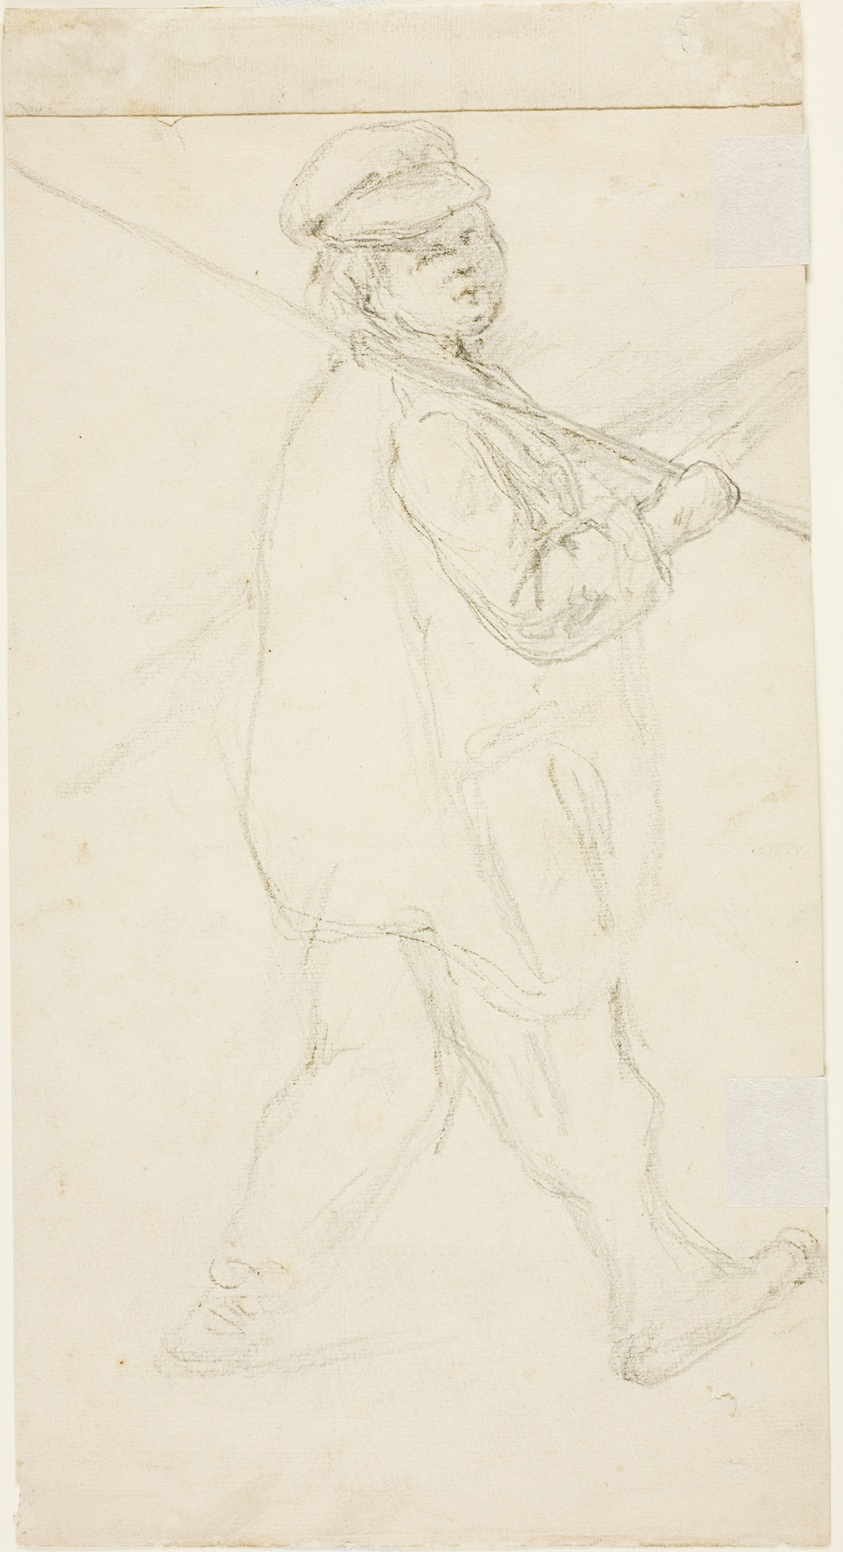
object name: Drawing and Watercolor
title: Peasant Woman (recto); Boy with a Fishing Pole (verso)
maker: Attributed to Camille Pissarro; French, 1830-1903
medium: Graphite, with watercolor (recto), and graphite (verso), on cream wove paper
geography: France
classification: graphite; drawings (visual works); prints and drawing